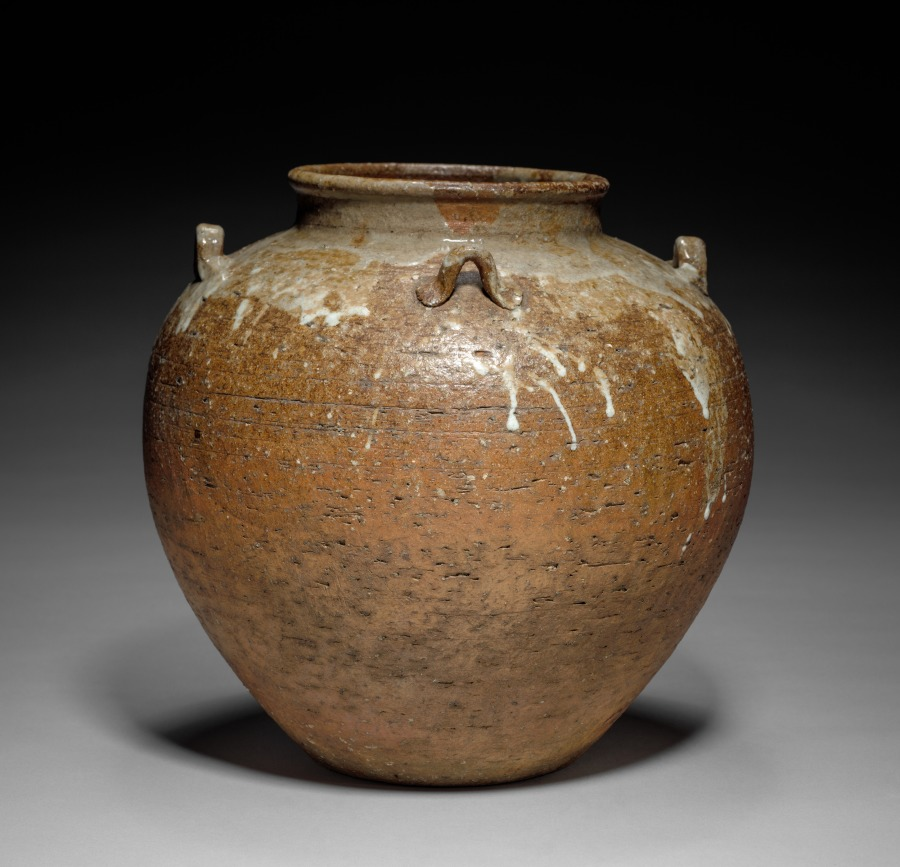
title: Tea Storage Jar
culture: Japan, Edo period (1615–1868)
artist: Nonomura Ninsei (Japanese, active 1640s–90s)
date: mid- to late 1600s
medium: Stoneware with white glaze (Shigaraki style)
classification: Ceramic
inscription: Ninsei seal impressed in the clay on bottom.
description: In this tea storage jar, Nonomura Ninsei reinterpreted a Shigaraki stoneware—made to hold agricultural products and known for its warm orange color, asymmetrical round forms, and irregular natural ash glazes—to produce a more refined piece that would appeal to tea masters seeking a touch of rusticity. In Japanese tea culture, hanging scroll paintings or calligraphy are placed in the tokonoma, or viewing alcove, for participants to admire and discuss along with the utensils used in the gathering. The scrolls are typically paired with vessels containing seasonal floral arrangements.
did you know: This jar may be considered an example of the aesthetic known as kireisabi, or refined rusticity.